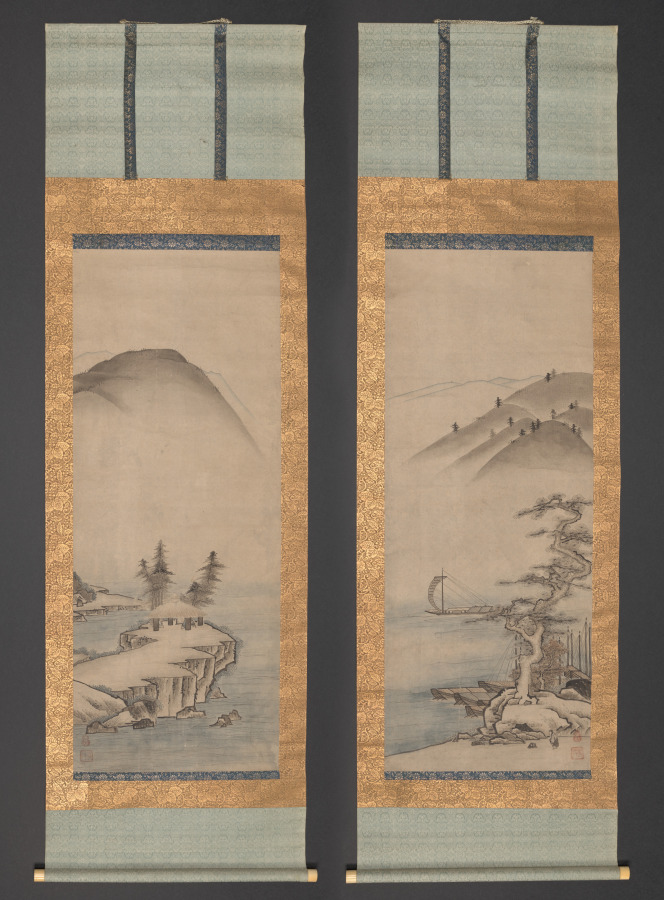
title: Landscapes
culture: Japan, Edo period (1615–1868)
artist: Unkoku Tōyo (Japanese, 1612–1688?)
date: mid- to late 1600s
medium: pair of hanging scrolls; ink and light color on paper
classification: Painting